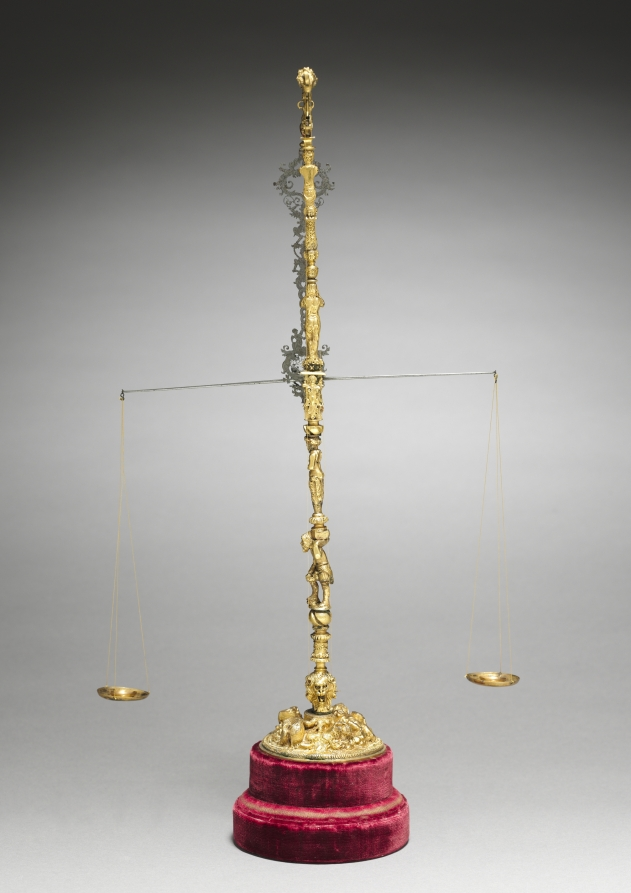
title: Scales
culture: Germany, Nuremberg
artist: workshop of Wenzel Jamnitzer I (German, 1508/09–1585)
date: c. 1525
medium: gilt bronze and silver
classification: Metalwork